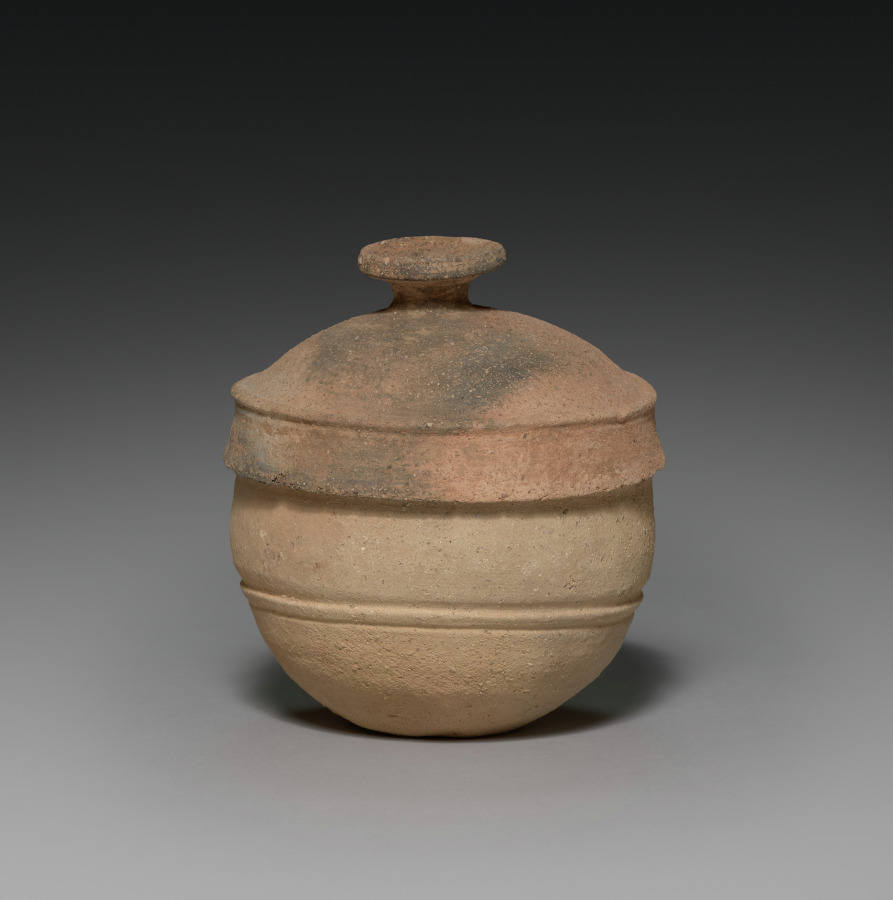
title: Lidded Jar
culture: Korea, Silla (57 BC-935) or Kaya (AD 42-562) period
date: 400s–500s CE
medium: red earthenware with incised band designs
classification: Ceramic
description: Early earthenware from the Three Kingdoms period (57 BCE–668) became widely utilized as agriculture and religion grew to be essential elements in sustaining society and its systems. The clay jars of different sizes and shapes on display were made for the following purposes: some were used to store harvested grains and seeds, some, especially lidded ones such as this, to preserve cremated remains, and some to serve offerings in rituals.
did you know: Closed kilns built on hillsides became widely used for producing this type of pottery vessel in Korea during the Three Kingdoms period.